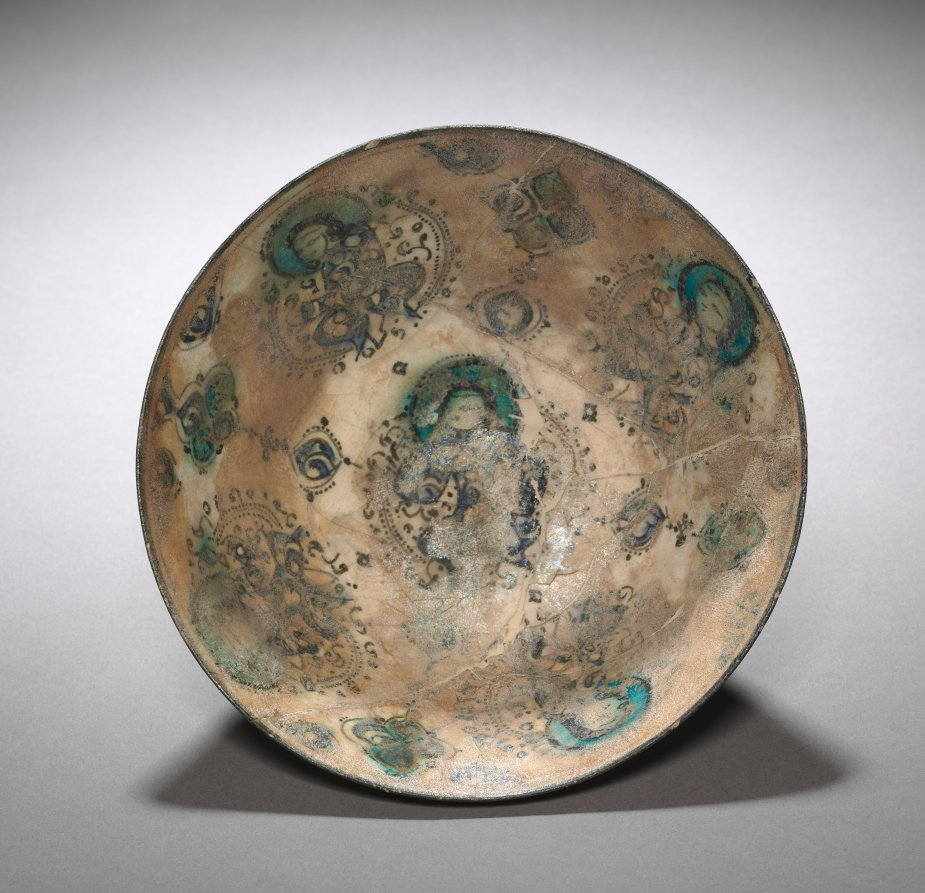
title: Bowl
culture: Iran, Kashan, Seljuq period of Iran (1037–1194)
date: mid-1200s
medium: fritware with overglaze-painted design (minai ware)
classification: Ceramic